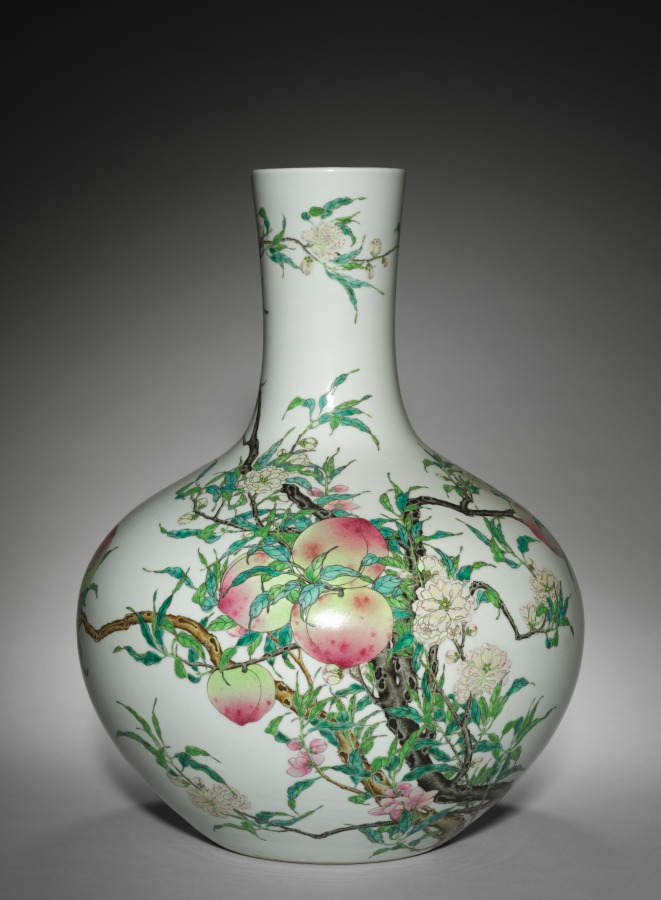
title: Bottle-shaped Vase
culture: China, Jiangxi province, Jingdezhen kilns, Qing dynasty (1644-1911), Qianlong mark and period (1736-95)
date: 1736–95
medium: porcelain with famille rose overglaze enamel decoration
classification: Ceramic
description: This spectacular vase, one of a pair in the collection, depicts flowering and fruiting peach trees to convey an auspicious message of affluence and long life. Developments in enamel technology led to new possibilities in polychrome decoration of Qing imperial porcelains. Pinks appeared, lending their name to the new palette of overglaze colors (famille rose), and the addition of opaque white allowed painters to vary the value of pigments, enhancing the painterly quality of porcelain decoration.